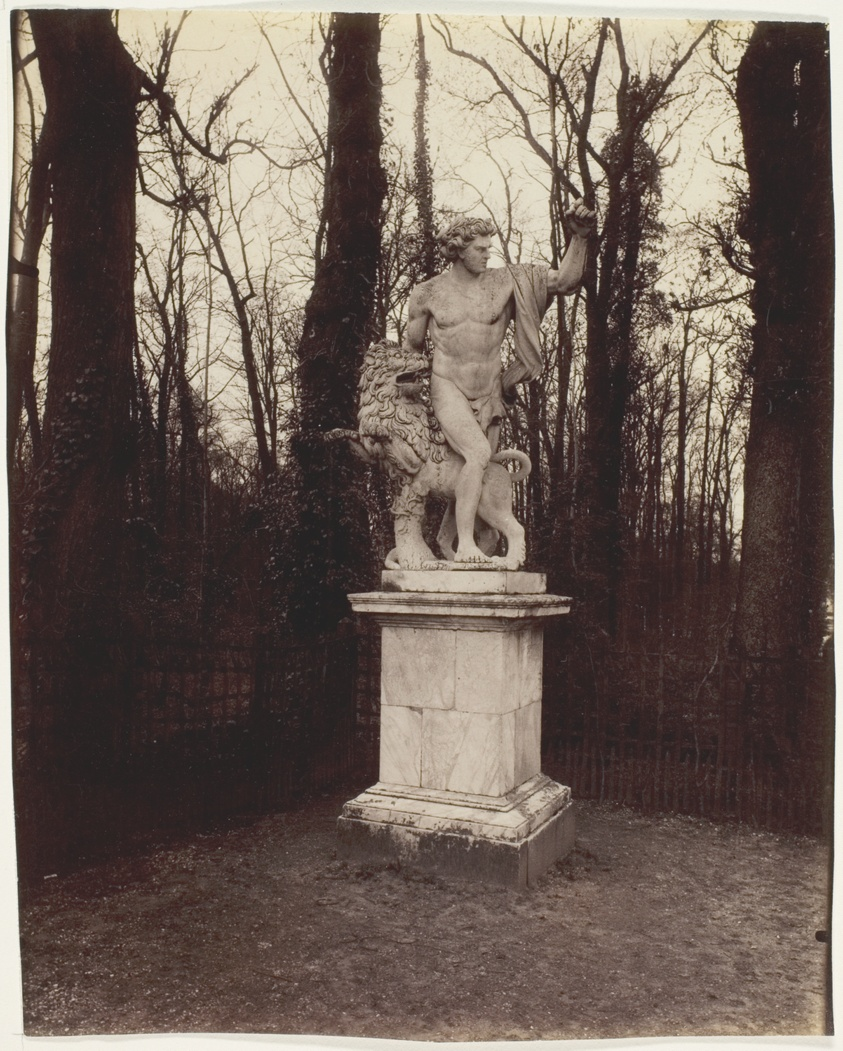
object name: Photograph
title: Versailles, Le Parc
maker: Jean-Eugène-Auguste Atget (French, 1857–1927)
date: 1901/02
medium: Albumen print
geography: France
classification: albumen silver print; photographic process; photography; photograph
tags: Collected by Hugh Edwards